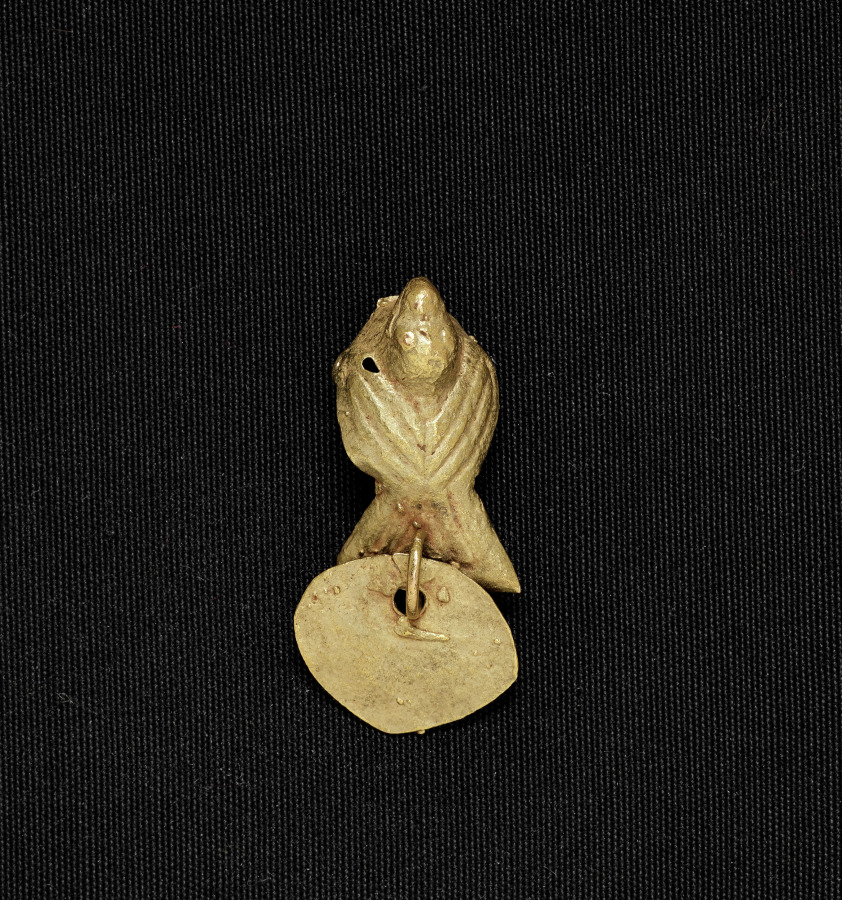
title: Bird Bead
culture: Colombia, Muisca style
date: c. 900–1550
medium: cast gold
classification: Jewelry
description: Muisca metalwork divides into two categories: ornaments to be worn, such as these, and offering figurines, in the case to the right. The elaborate bird pendant features delicate herringbone moldings, openwork patterns, and wing details-all part of the wax model from which the pendant was cast (see nearby computer animation). The dangles were attached after casting.